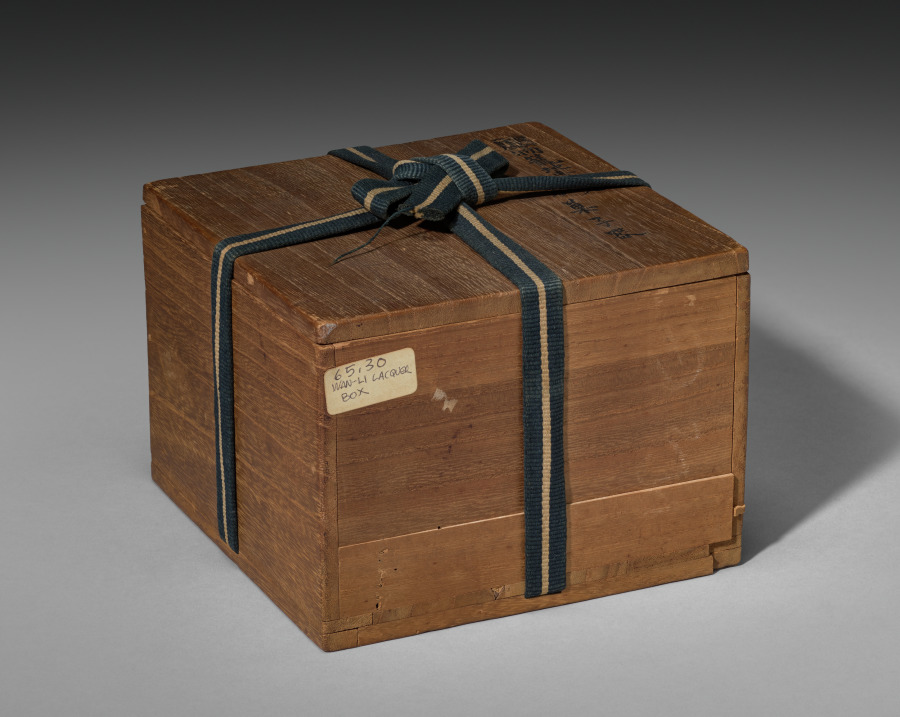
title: Wickerwork Box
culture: China, Ming dynasty (1368-1644), Wanli reign (1572-1620)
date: 1609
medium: lacquered wickerwork (of woven bamboo) framed in wood with circular scene inlaid in mother-of-pearl and gold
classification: Lacquer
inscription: Inscription at bottom in red on black lacquer reads: "commissioned by Yü-Yün-ch'i".